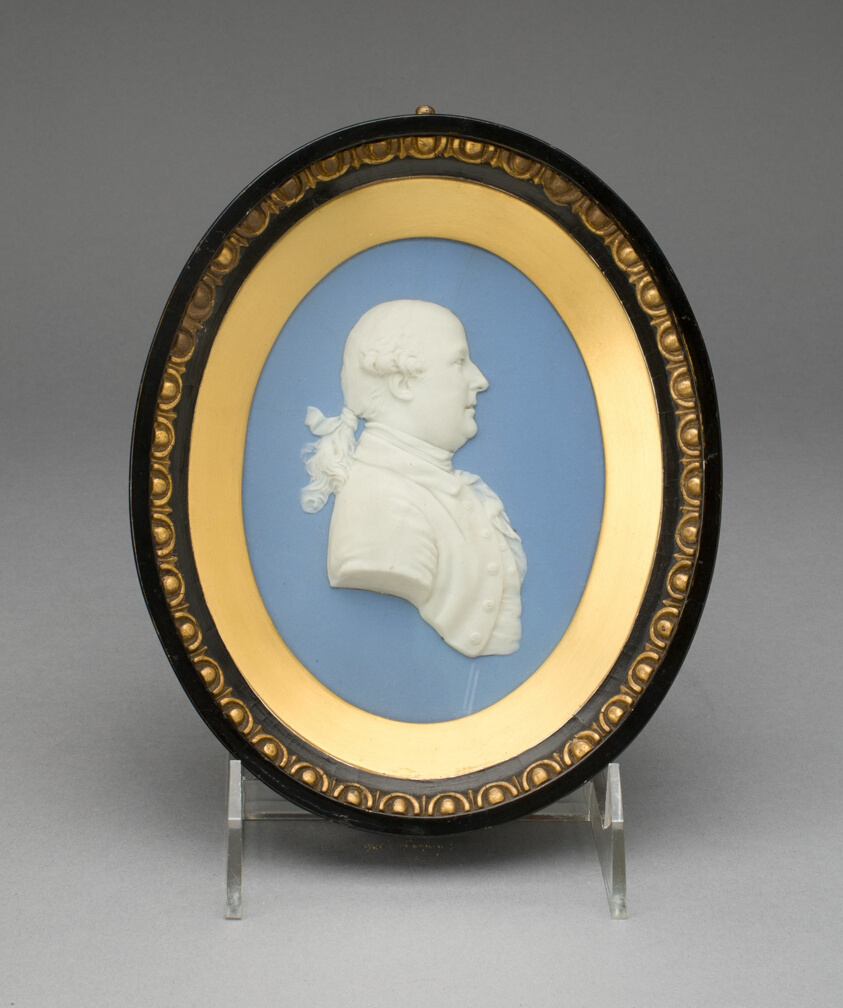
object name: Ceramics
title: Medallion with Portrait of Thomas Bentley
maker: Wedgwood Manufactory (England, founded 1759)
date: c. 1775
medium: Stoneware (jasperware)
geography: Burslem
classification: sculpture; ceramics; stoneware; european decorative arts